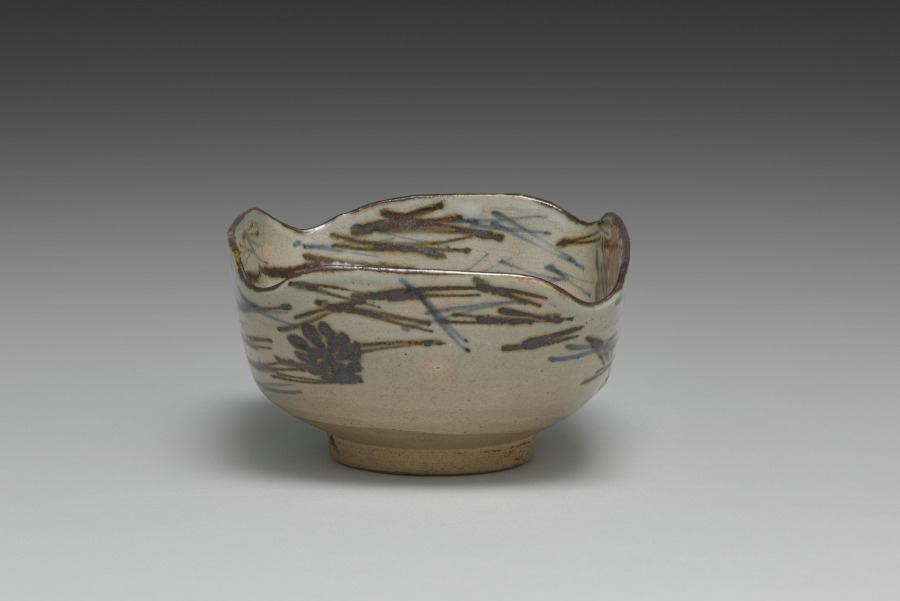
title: Nesting Dish with Scattered Pine Needles and Maple Leaves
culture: Japan, Edo period (1615–1868)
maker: Seifū Yohei I (Japanese, 1801–1861)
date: 1861–78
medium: One of a pair of side dishes; stoneware with underglaze blue and iron oxide, white slip, and overglaze color enamel (Kyoto ware)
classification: Ceramic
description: Seifū Yohei I made both blue and white porcelains after Ming dynasty (1368–1644) Chinese wares fired in the kilns at Jingdezhen for export. He also made colorful stoneware in the style of his teacher, Nin’ami Dōhachi (Takahashi Dōhachi II) (1783–1855).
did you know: The smaller dish is stamped with one of Yohei I’s seals.